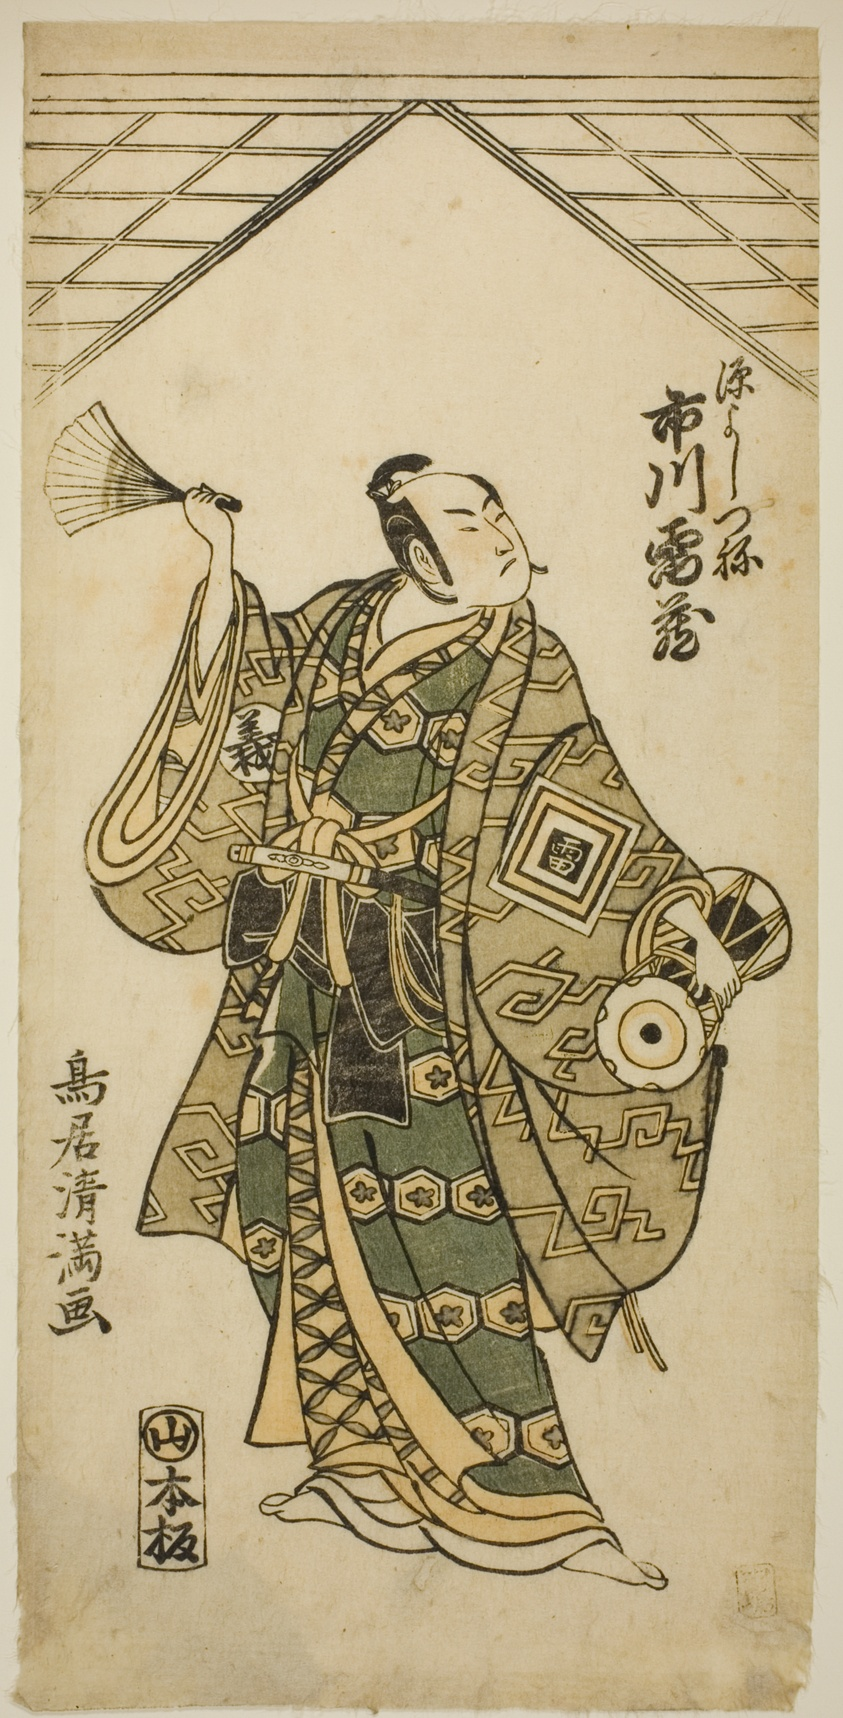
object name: Print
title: The Actor Ichikawa Raizo I as Minamoto no Yoshitsune in the play "Nihon ga Hana Hogan Biiki," performed at the Nakamura Theater in the eleventh month, 1761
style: Japanese (culture or style)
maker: Torii Kiyomitsu I (Japanese, 1735–1785)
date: 1761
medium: Color woodblock print; hosoban, benizuri-e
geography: Japan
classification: woodblock print; print; asian art